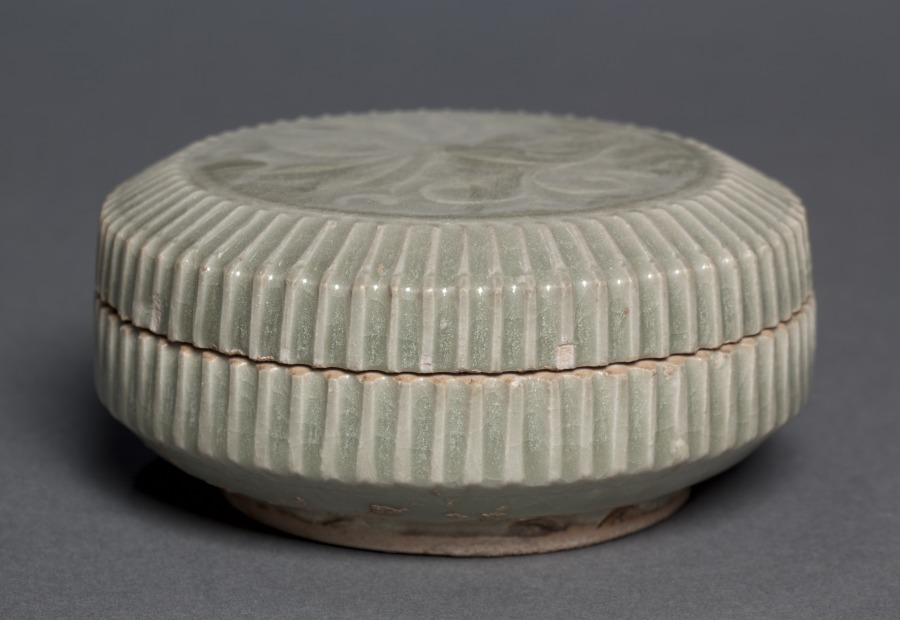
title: Covered Box with Carved Floral Design: Yaozhou Ware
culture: China, Shanxi province, Northern Song dynasty (960-1127)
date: 1100s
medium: glazed stoneware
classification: Ceramic